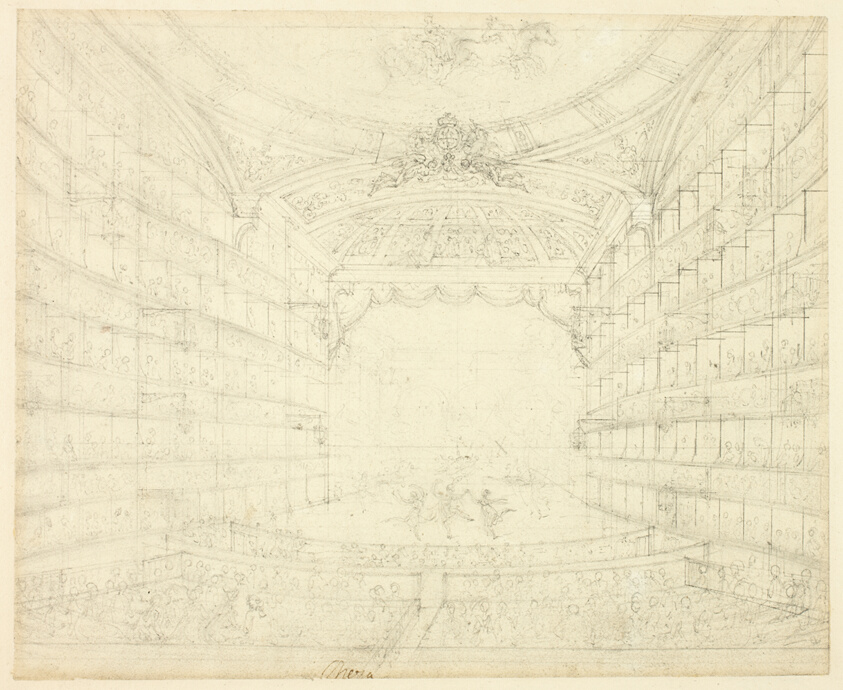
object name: Drawing and Watercolor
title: Study for Opera House, from Microcosm of London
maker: Augustus Charles Pugin (English, born France, 1762-1832); Thomas Rowlandson (English, 1756-1827)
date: c. 1809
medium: Graphite on ivory wove paper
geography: England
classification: graphite; drawings (visual works); prints and drawing